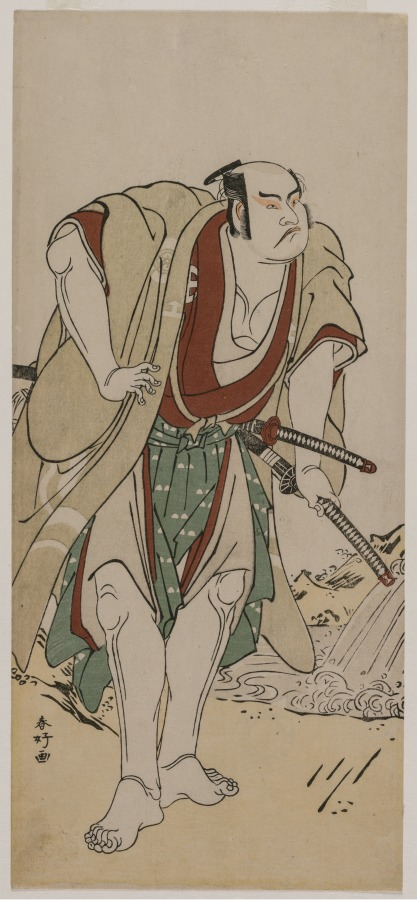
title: Otani Hiroji III as a Samurai Standing Beside a Stream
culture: Japan, Edo period (1615–1868)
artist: Katsukawa Shunkō (Japanese, 1743–1812)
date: c. 1780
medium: color woodblock print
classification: Print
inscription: Signature: Shunko ga